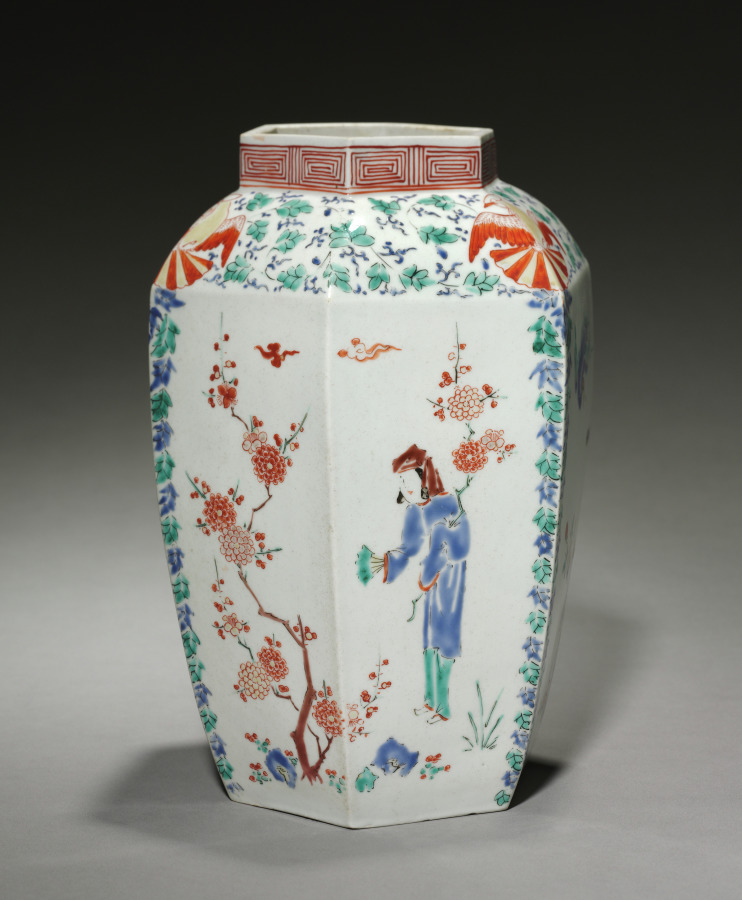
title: Hexagonal Jar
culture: Japan, Edo period (1615–1868)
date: late 1600s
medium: porcelain with overglaze enamel and gold decoration (Hizen ware, Kakiemon type)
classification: Ceramic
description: This pair of jars originally possessed domed lids. Their imposing size, shape, and Chinese-style décor identify them as products made for the European markets in England, Holland, France, and Germany. Indeed many similar examples can be seen in museum and historic house collections in those countries. Such Kakiemon ware also inspired domestic porcelain production in Europe in the 18th and 19th centuries.